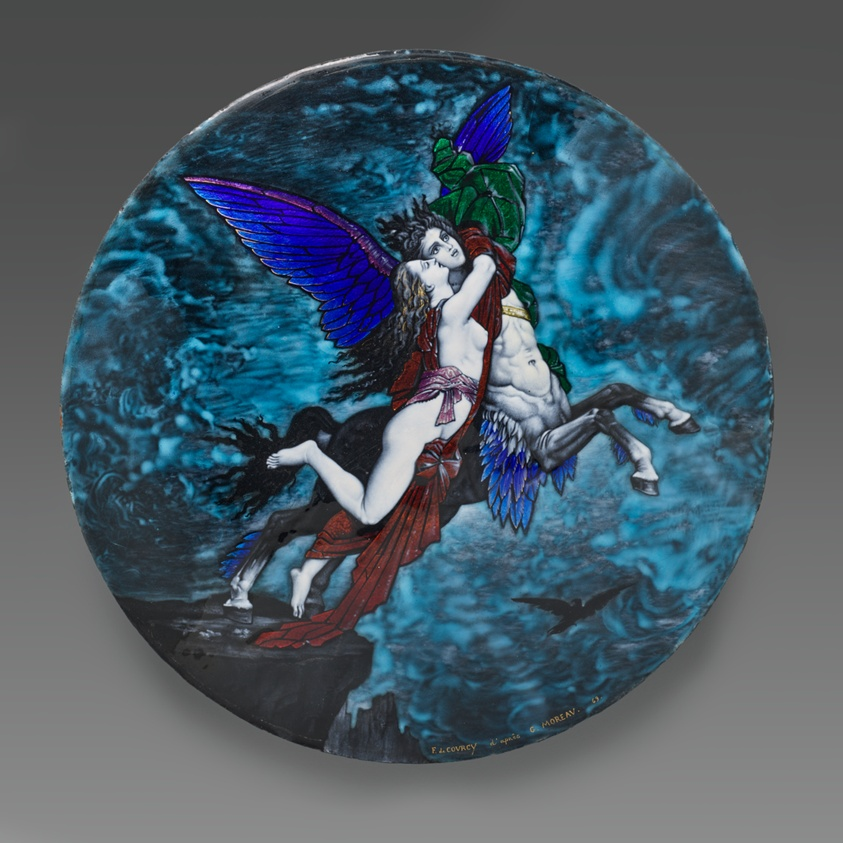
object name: Mixed Media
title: Chimera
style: nineteenth century, Symbolism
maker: Frédéric Charlot de Courcy (French, 1832–1886); After Gustave Moreau (French, 1826–1898)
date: 1869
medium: Enamel on copper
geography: France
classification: enamel; copper; metal; france; french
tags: Chimera, cliff, horse, man, woman, drapery, mythical, nudes, blue